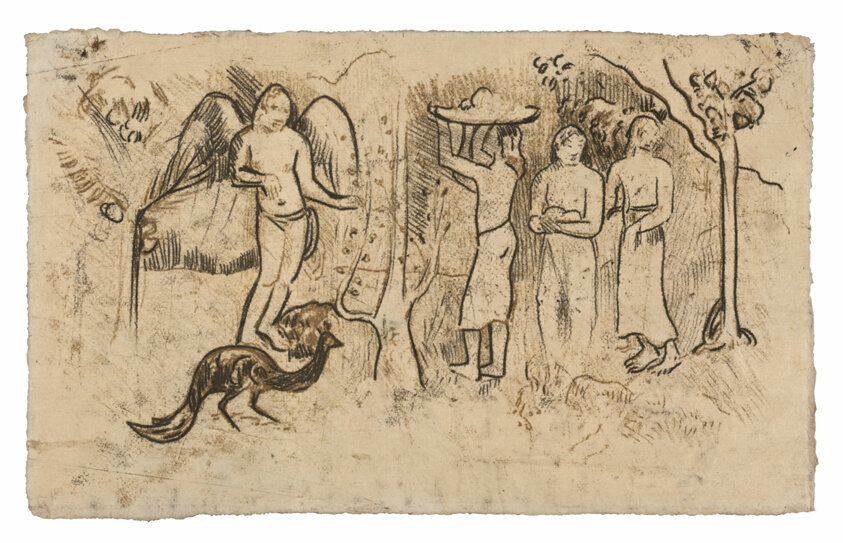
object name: Print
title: Angel, Peacock, and Three Tahitians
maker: Paul Gauguin (French, 1848-1903)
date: c. 1902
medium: Transfer drawing in brown and black ink on cream Japanese paper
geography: France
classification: monotype; print; prints and drawing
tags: Century of Progress, world's fairs, Chicago World's Fairs